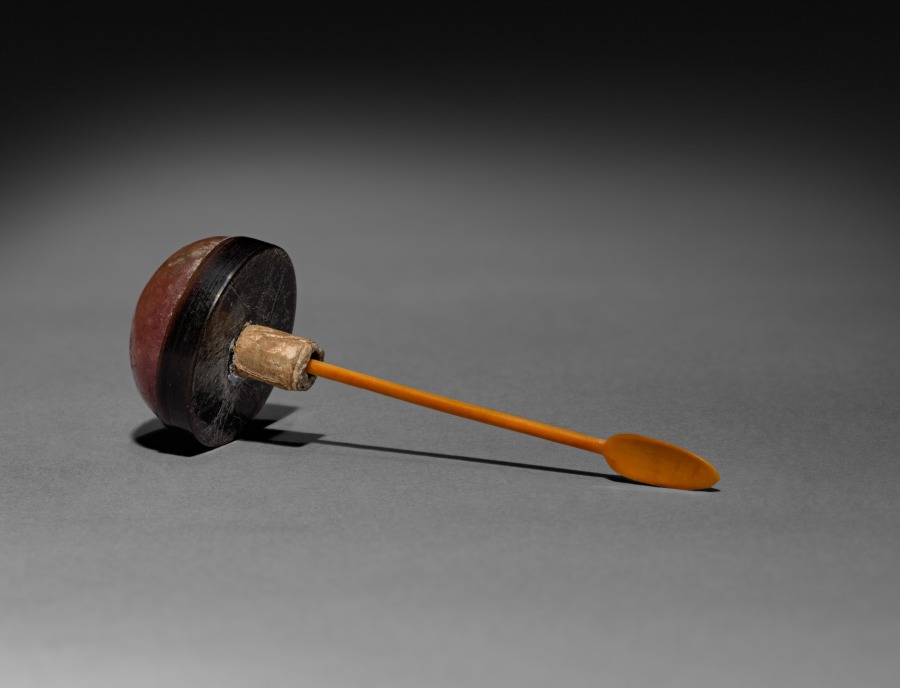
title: Snuff Bottle (stopper)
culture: China, Qing dynasty (1644-1911)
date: 1644–1911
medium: glass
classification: Glass